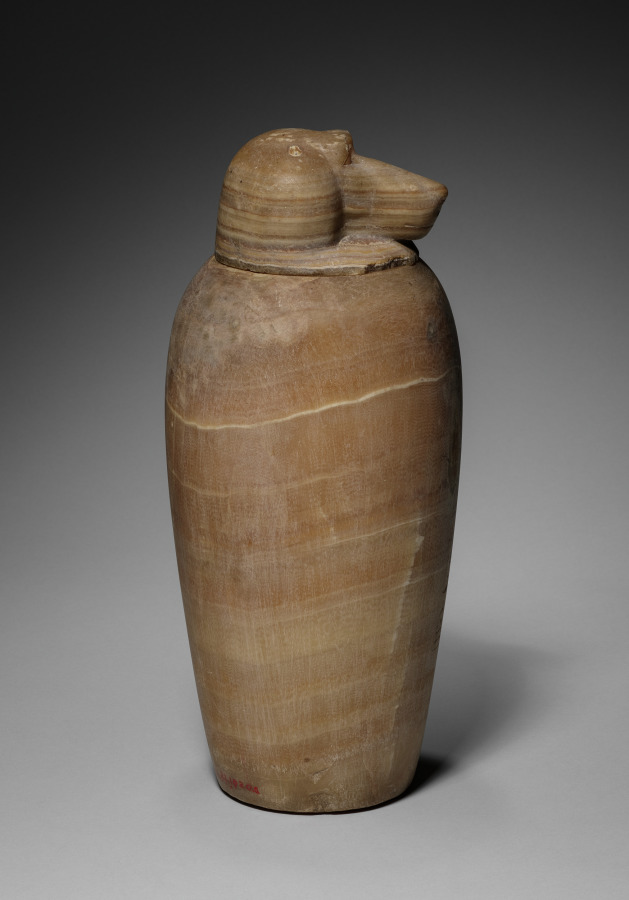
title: Canopic Jar with Baboon's Head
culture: Egypt, Late period (715–332 BCE), Dynasty 26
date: 664–525 BCE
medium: travertine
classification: Funerary Equipment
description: In the process of mummification, the liver, lungs, stomach, and intestines were removed, separately embalmed, and stored in specialized jars known as canopic jars (after a sailor in Greek mythology, who died at the town of Canopus in the Nile Delta and was worshipped there in the form of a human-headed jar). Each organ was identified with one of four funerary deities collectively known as the Sons of Horus: the liver with Imsety (man's head), the lungs with Hapy (baboon's head), the stomach with Duamutef (jackal's head), and the intestines with Qebehsenuef (falcon's head). It was their duty to protect the deceased and restore to him his body parts in the hereafter.